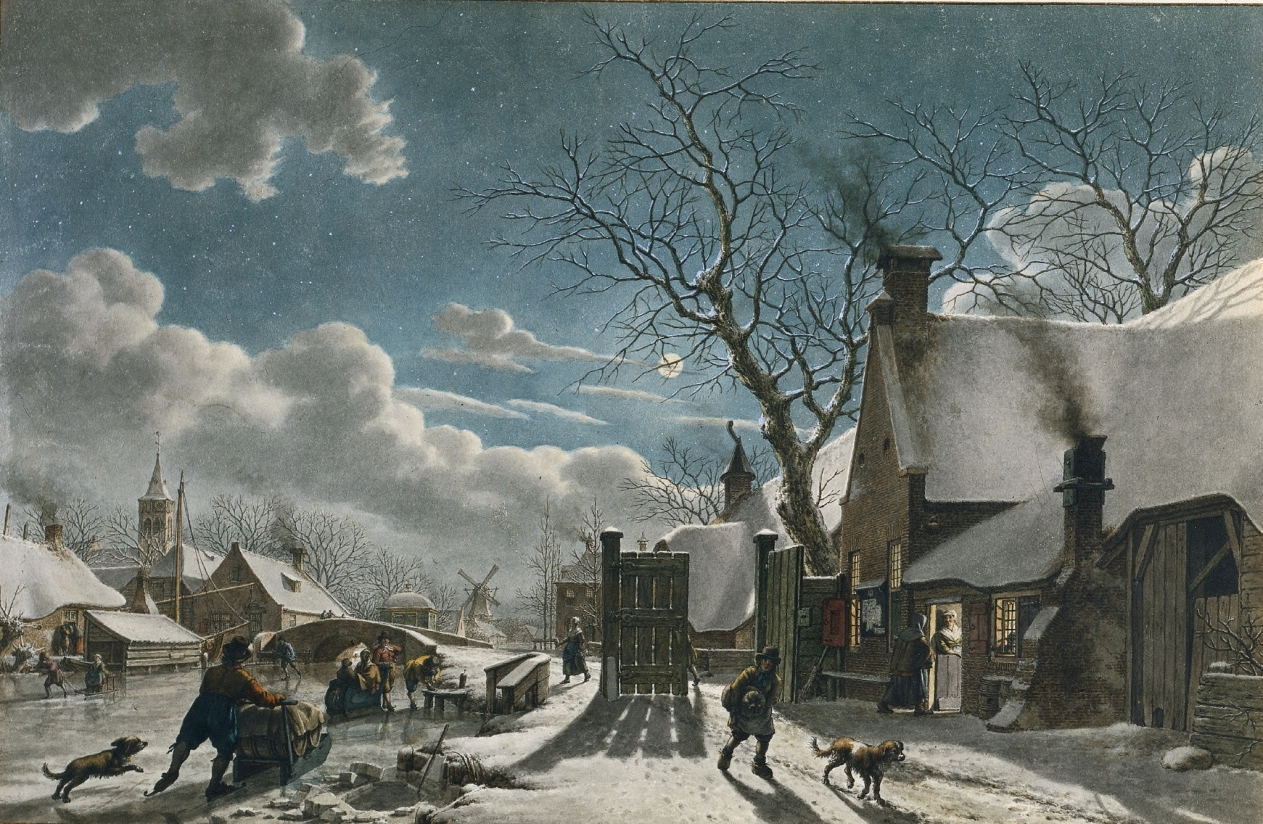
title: Winter Night in a Dutch Town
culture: Netherlands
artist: Jacob Cats (Dutch, 1741–1799)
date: 1797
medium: watercolor heightened with white gouache; framing lines in brown wash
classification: Drawing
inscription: VERSO, signed(?), lower left, in brown ink: J. Cats inv et fec / 1797 ; lower left, in brown ink: 3 [upside down] ; upper left, in red pencil: 314 / T. H. ; lower left, in graphite: Coll. ten Cate Nr. 195 / [75?].116 ; lower left, in graphite: 17 [erased] ; lower right, in graphite: Biz. [under remnants of brown paper label, with typed notation "Biz."] 134. ; lower right, media not discernible (under paper label): [illegible] ; lower right, in graphite: A096 [beneath remnant of brown paper label] ; lower right, in graphite: [illegible] ; lower right, in graphite(?): 41 ; FRAGMENT OF OLD MOUNT(now removed), in graphite: J. Cats drawing ; Coll. ten Cate no. 195